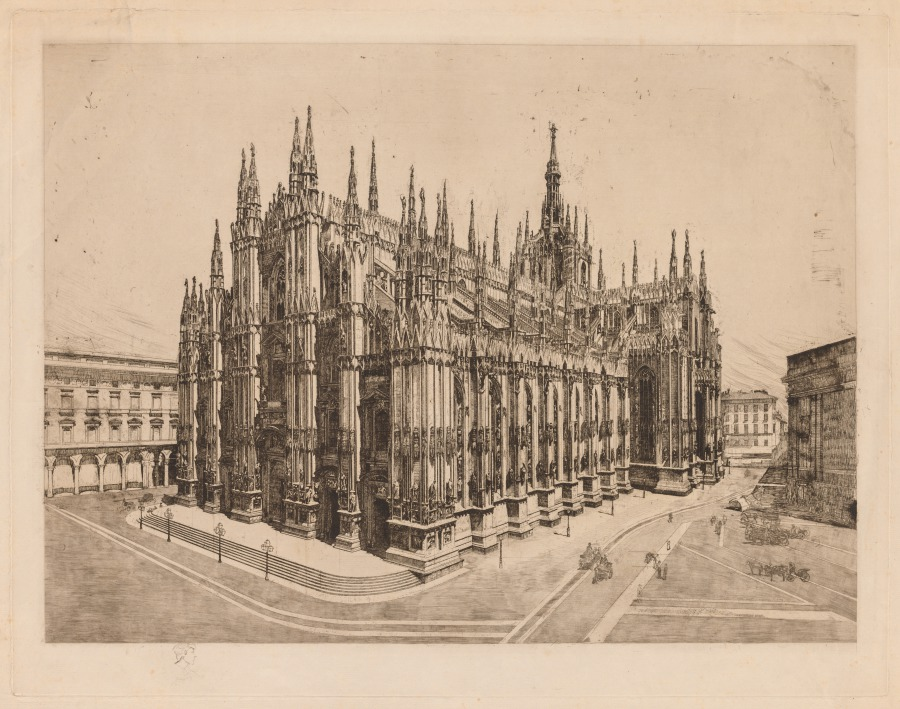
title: Cathedral, Milan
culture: America, late 19th-early 20th century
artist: Otto H. Bacher (American, 1856–1909)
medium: etching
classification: Print